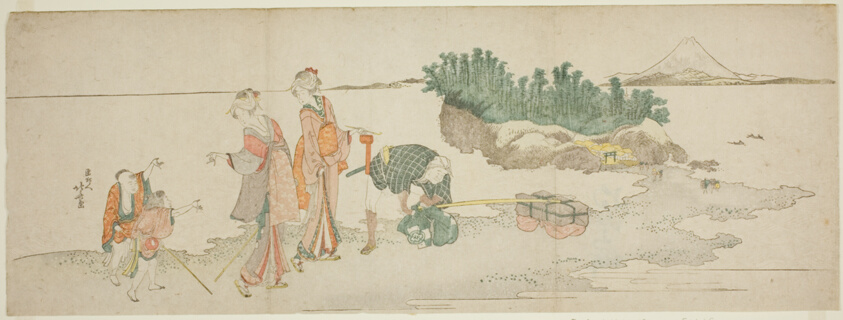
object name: Print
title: Visitors to Enoshima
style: Japanese (culture or style)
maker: Katsushika Hokusai 葛飾 北斎; Japanese, 1760-1849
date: c. 1801/04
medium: Color woodblock print; ebangire, surimono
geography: Japan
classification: woodblock print; print; asian art